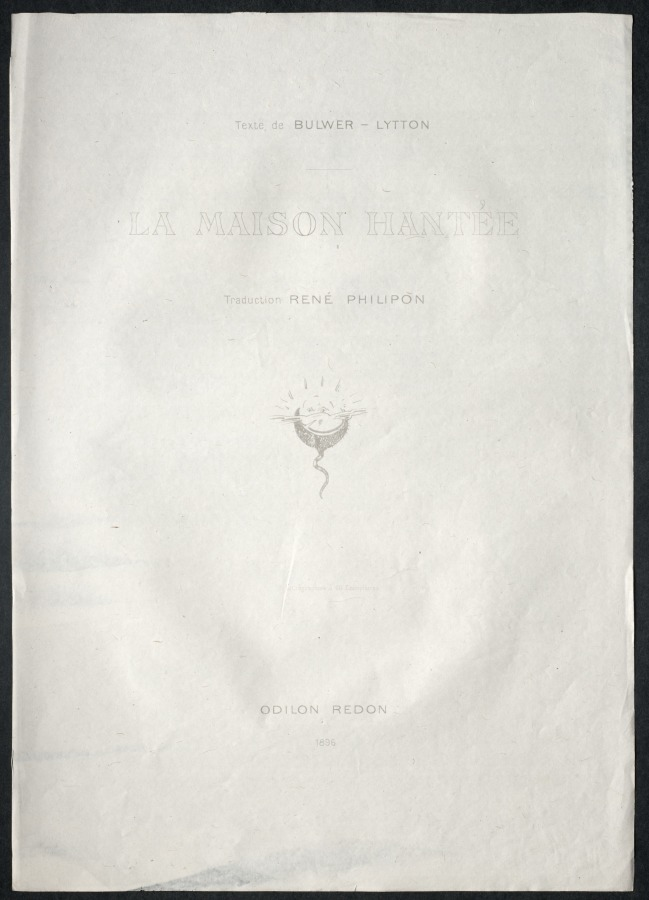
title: The Haunted House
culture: France, late 19th Century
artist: Odilon Redon (French, 1840–1916)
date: 1896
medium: six lithographs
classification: Print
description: Odilon Redon was a voracious reader of contemporary literature, and such texts often influenced his art. This series was inspired by The Haunted and the Haunters, an 1859 novel by British writer Edward Bulwer-Lytton. Redon’s prints capture the book’s mysterious tone and emphasis on the supernatural through vague but evocative imagery that sometimes borders on abstraction. By this time a seasoned expert in lithography, the artist collaborated with master printer Auguste Clot. Their combined technical skills allowed for the rich tonal variation seen here, made by turning Redon’s lithographic crayon on its side, layering various marks, and even scratching directly into the surface of his stone.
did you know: One of Redon's greatest patrons, the occultist René Philipon, commissioned this portfolio as a supplement for his French translation of Bulwer-Lytton's The Haunted and the Haunters.